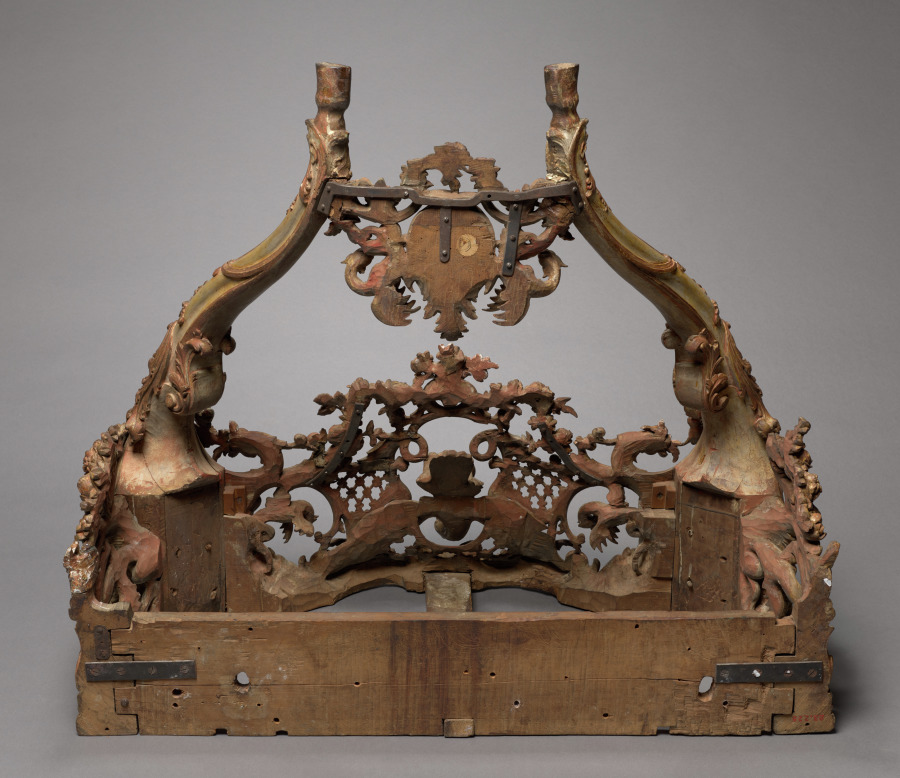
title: Console Table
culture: France, 18th century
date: c. 1720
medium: carved and painted wood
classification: Furniture and woodwork